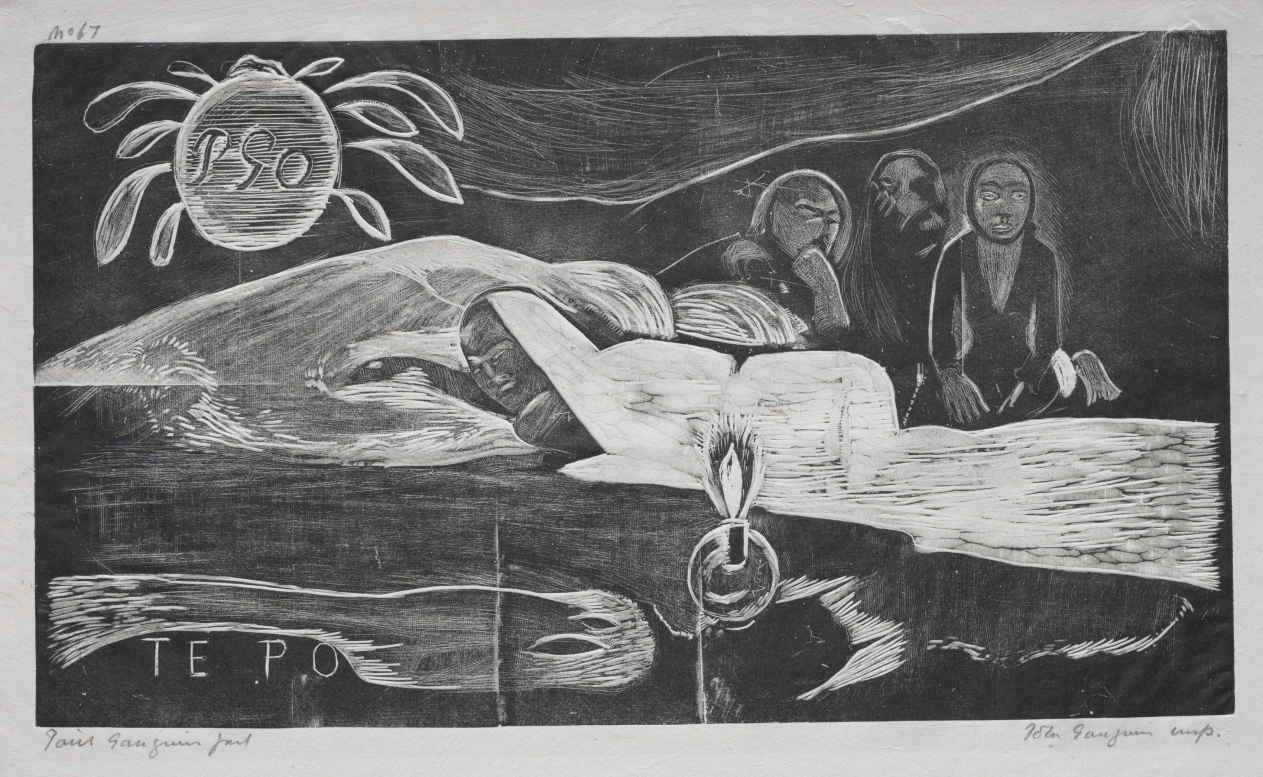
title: Noa Noa: Te Po (Eternal Night)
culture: France, 19th century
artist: Paul Gauguin (French, 1848–1903)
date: 1893–94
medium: woodcut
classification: Print